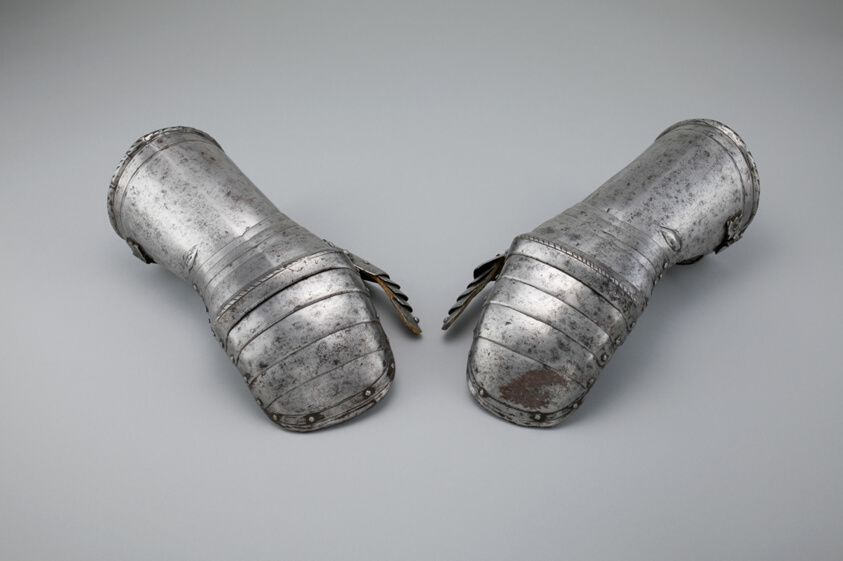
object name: Armor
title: Pair of Mitten Gauntlets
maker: German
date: c. 1530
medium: Steel and leather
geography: Germany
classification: suit-gauntlet; armor; arms and armor